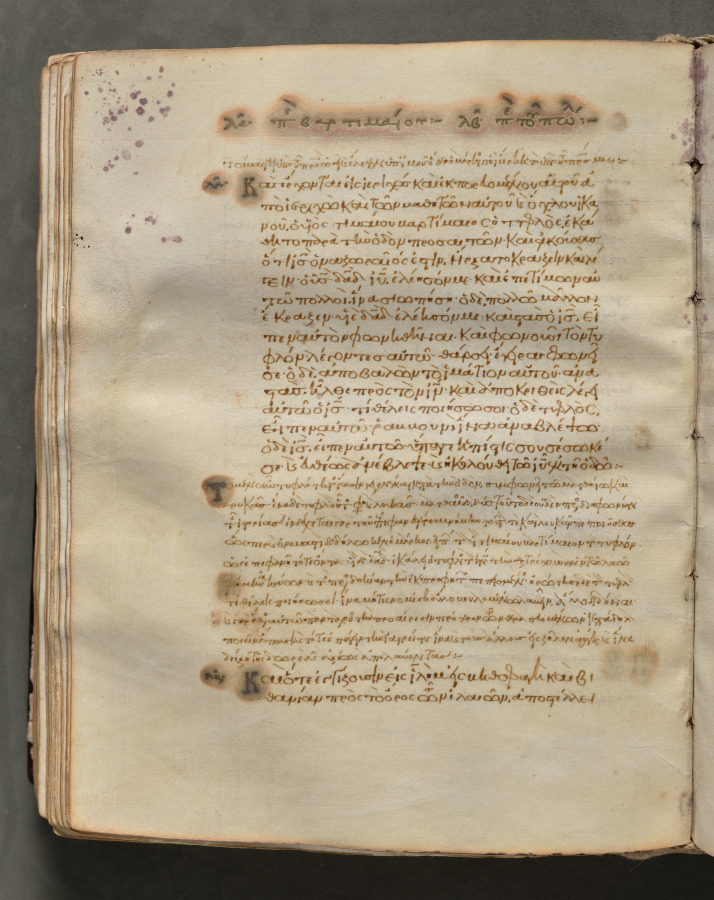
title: Text, folio 172 (verso), from a Gospel Book with Commentaries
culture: Byzantium, Constantinople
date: c. 1000–1100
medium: ink, tempera, and gold on vellum; leather binding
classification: Bound Volume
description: Each of the four gospels in this book opens on a page with brilliantly illuminated borders depicting the author of the text as well as birds-principally peacocks, symbols of the immortality of the soul-and fountains, representing the fountain of life and the salvation of the soul. This volume consists of 428 leaves with texts in Greek. Its level of sophistication suggests that it was probably written and decorated in a monastery in Constantinople.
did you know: Gospel Books were carried in procession through Byzantine churches.